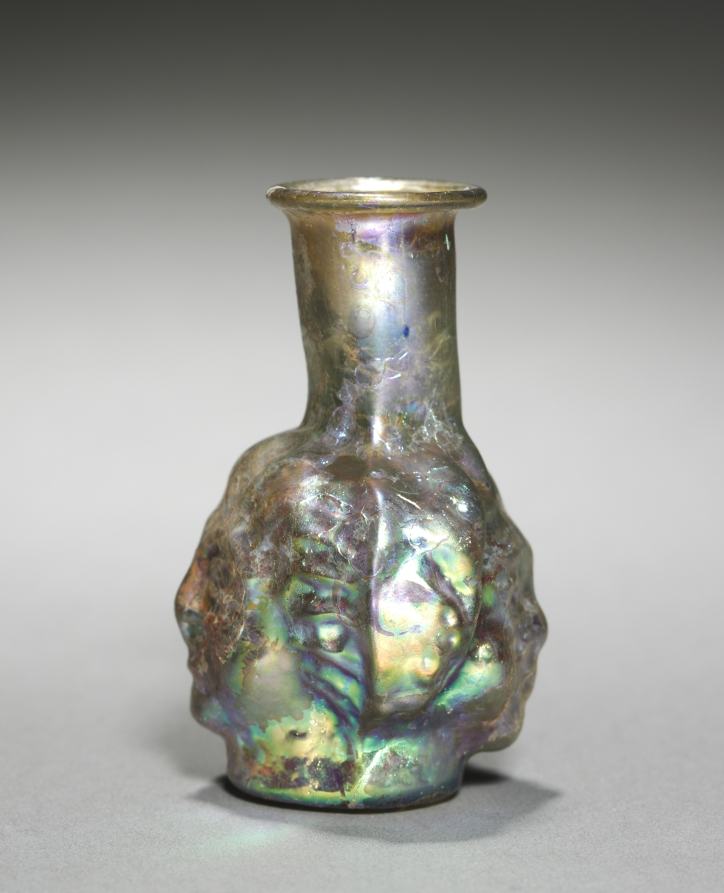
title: Janiform Head Flask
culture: Roman, probably Eastern Mediterranean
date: 100–400 CE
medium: glass, mold-blown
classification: Glass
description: Called Janiform after Janus, the two-faced Roman god associated with doorways and beginnings, two-faced head flasks like this were popular across the Roman Empire. The faces themselves, quite similar to one another, could both represent Janus, although he is typically bearded and here the gender is unclear. Some other two-faced head flasks clearly differentiate between the two sides, showing one serious, the other smiling.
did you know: The iridescence covering much of the surface obscures the original violet-like color.